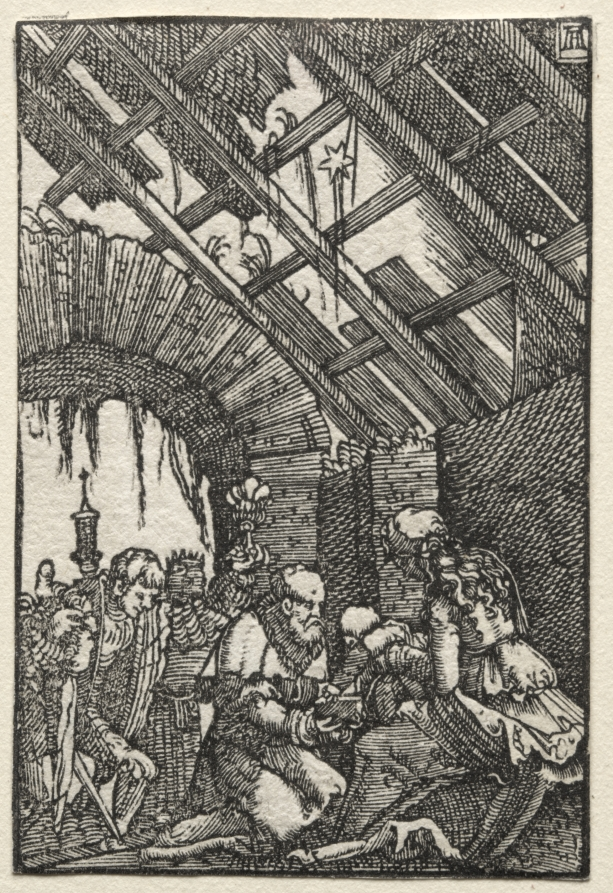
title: The Fall and Redemption of Man: The Adoration of the Magi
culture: Germany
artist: Albrecht Altdorfer (German, c. 1480–1538)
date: c. 1515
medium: woodcut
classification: Print